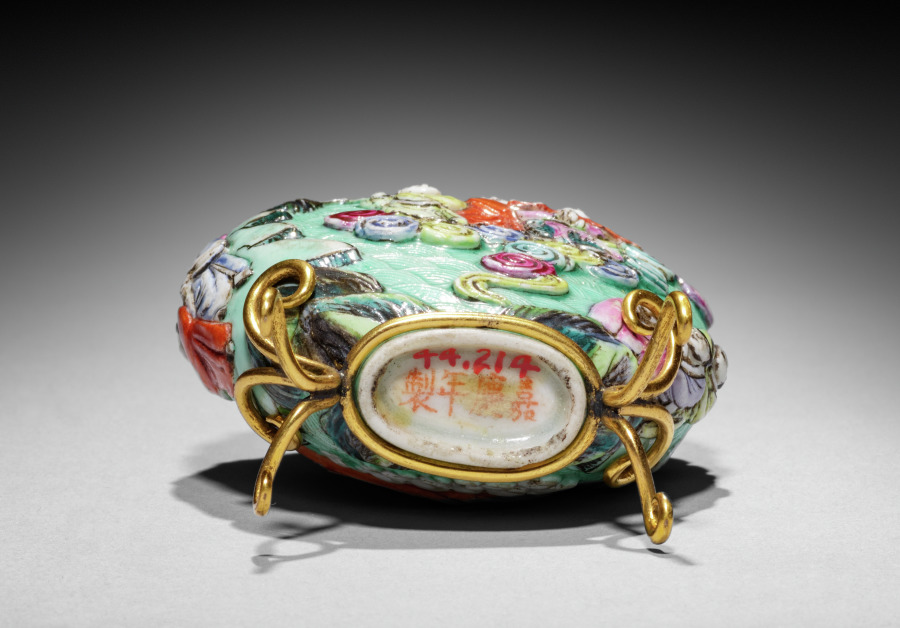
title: Flattened Ovoid Snuff Bottle with Stopper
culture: China, Qing dynasty (1644-1911), Jiaqing reign (1796-1820)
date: 1796–1820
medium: porcelain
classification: Ceramic